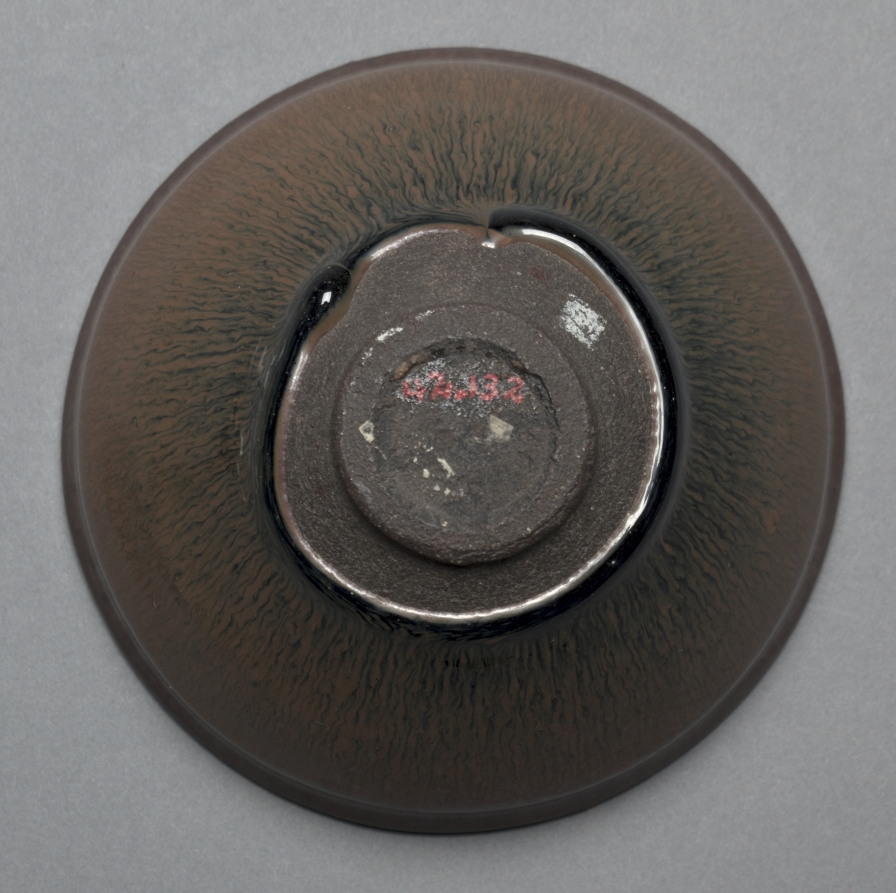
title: Tea Bowl: Jian Ware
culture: China, near Shui ch'i, Song dynasty (960-1279)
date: 960–1279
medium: stoneware with "hare's fur" glaze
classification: Ceramic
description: Jian ware was very popular with the tea cultures in China and Japan.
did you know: "Hare’s fur” glaze is named for the streaks resembling delicate hairs.